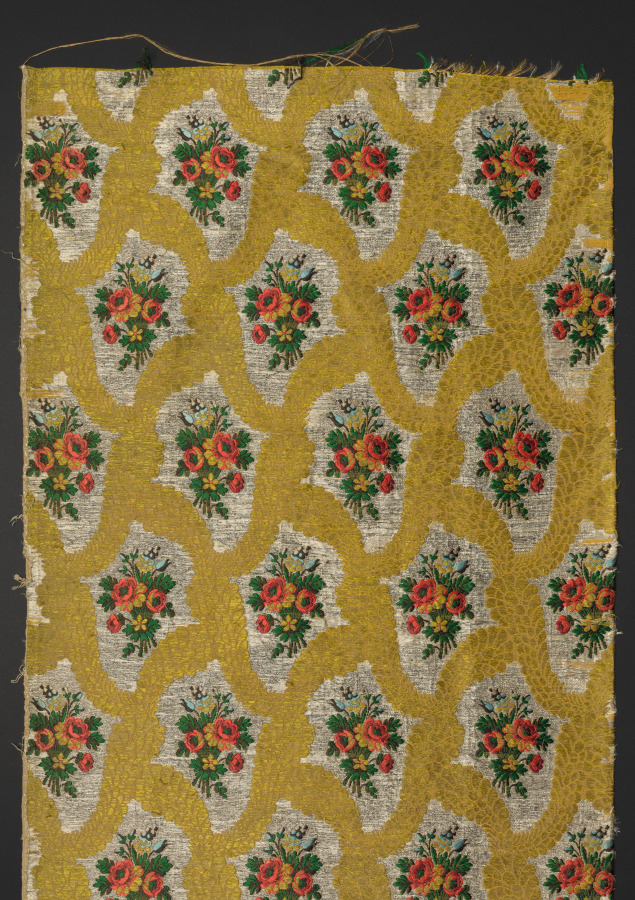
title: Coverlet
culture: Italy, 18th century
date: 1700s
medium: silk, metallic thread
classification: Textile